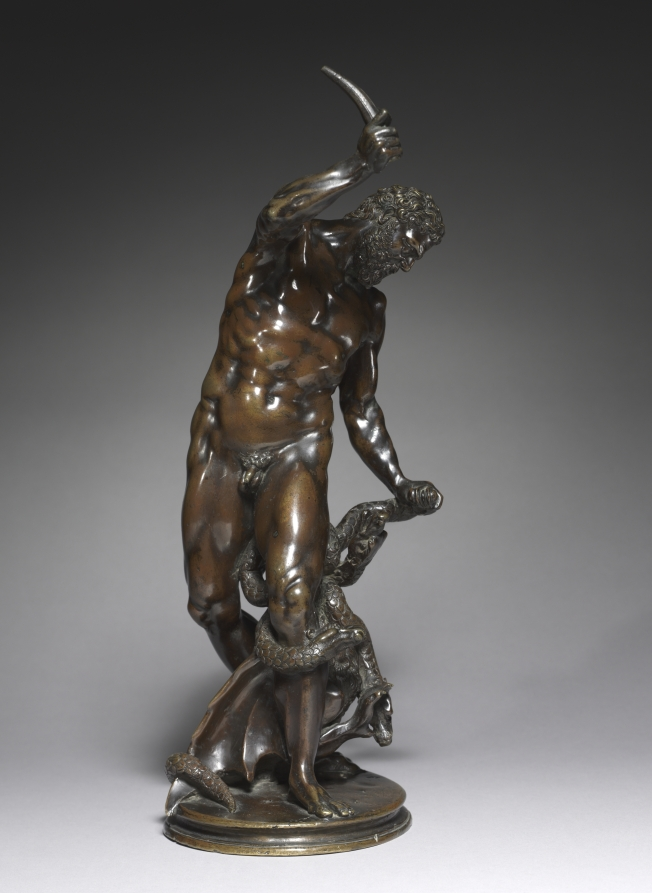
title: Hercules and the Hydra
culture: Northern Europe, late 16th-early 17th century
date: late 1500s-early 1600s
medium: bronze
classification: Sculpture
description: Hercules slayed the Lernean Hydra as the second of the ancient hero’s twelve labors. When one of the nine snake-like heads was destroyed, two grew back. Hercules cauterized each stump, allowing him eventually to kill the monster. The object he holds may have been a club, sword, sickle, or torch. The sinuous, scaly Hydra and the defined musculature presented challenging opportunities for sculptors working in bronze. The raw, tumultuous energy and twisting form-associated with artists of the late 1500s-contrasts to Jacopo Sansovino’s earlier Virgin and Child (1951.316).